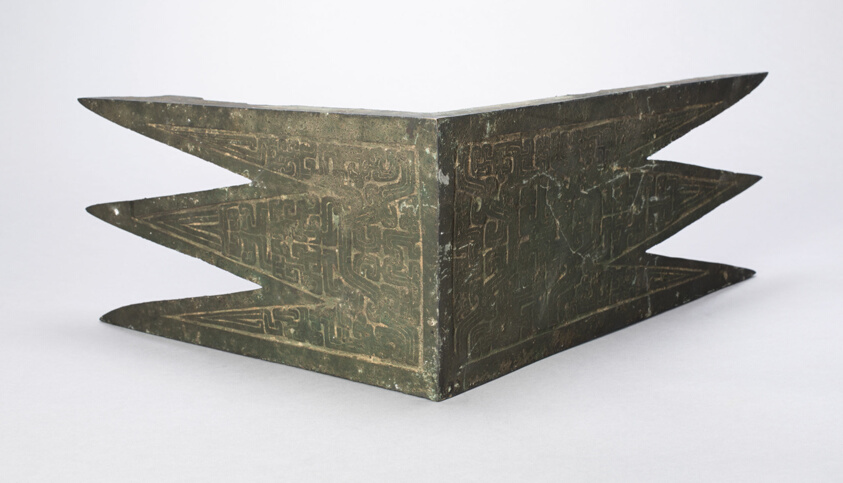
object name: Architectural fragment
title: Architectural Fitting (Gong)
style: Chinese (culture or style)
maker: China, Qishan county, Shaanxi province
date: Eastern Zhou dynasty, Spring and Autumn period (770–481 B.C.), 7th century B.C.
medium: Bronze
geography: China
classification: architectural fragment